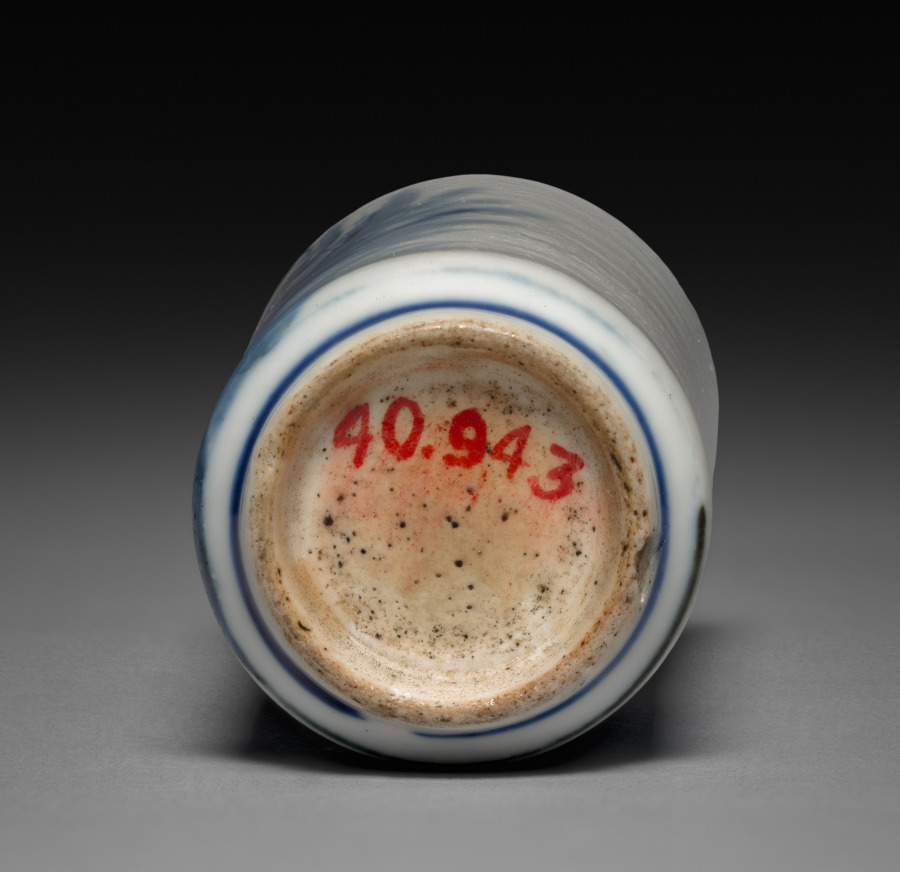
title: Blue and White Snuff Bottle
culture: China, Qing dynasty (1644-1911), Kangxi reign (1661-1722)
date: 1661–1722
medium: porcelain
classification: Ceramic